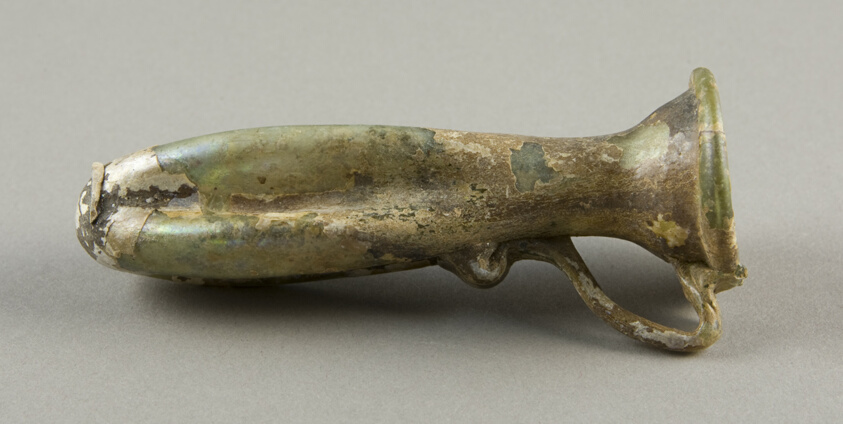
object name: Vessel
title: Flask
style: syrian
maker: Roman; Levant or Syria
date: 3rd century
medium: Glass, blown technique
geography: Syria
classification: glass; vessel; ancient art